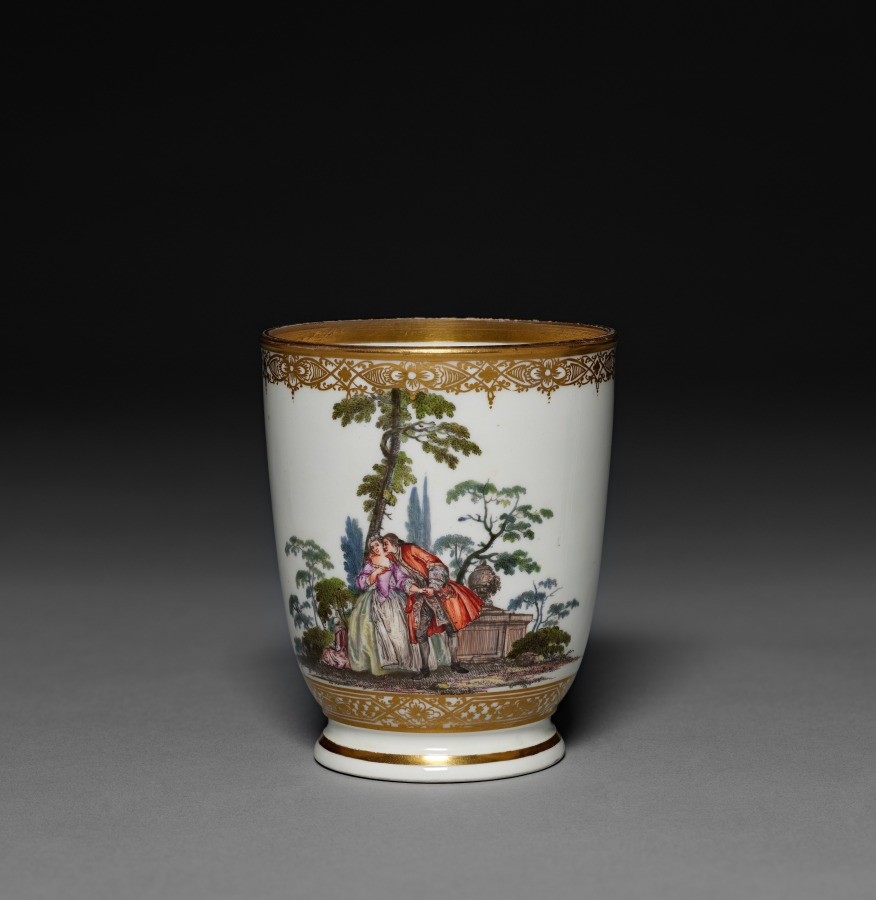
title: Beaker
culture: Germany, Meissen, 18th century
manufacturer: Meissen Porcelain Factory (German, est. c. 1710)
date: c. 1745–1750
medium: porcelain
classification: Ceramic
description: In an effort to rejuvenate its style of decoration, the Meissen factory acquired a large group of French engravings about 1740. During the next decade, figural decorations in the style of Antoine Watteau and his followers became a typical mode of decoration on Meissen pporcelain.